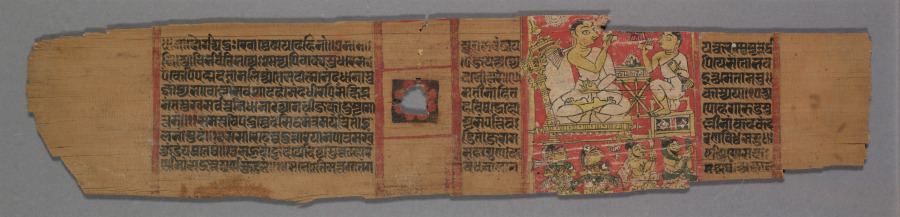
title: Monk preaching to a disciple with a lay audience, folio 2 (recto) from a Parshvanatha Charitra (Life and Stories of Lord Parshva) of Bhavadeva-suri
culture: Western India, Gujarat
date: c. 1275–1300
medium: Gum tempera and ink on palm leaf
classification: Painting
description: The scene of a senior monk teaching his disciple emphasizes the importance of oral transmission of stories and knowledge. Both wear the white robes of the Shvetambara sect, have whisk brooms for clearing the ground of living things, and hold shields in front of their mouths to prevent harm to insects that might fly in while they speak. Between them, on a tripod, rests a sacred manuscript with letters written on the side and flowers placed on top. Below, two women and two men, possibly the donors who paid for the production of the manuscript, press their hands together in veneration.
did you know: The book on the stand is called "substitute teacher" and refers to the monk's legitimate lineage of knowledge.